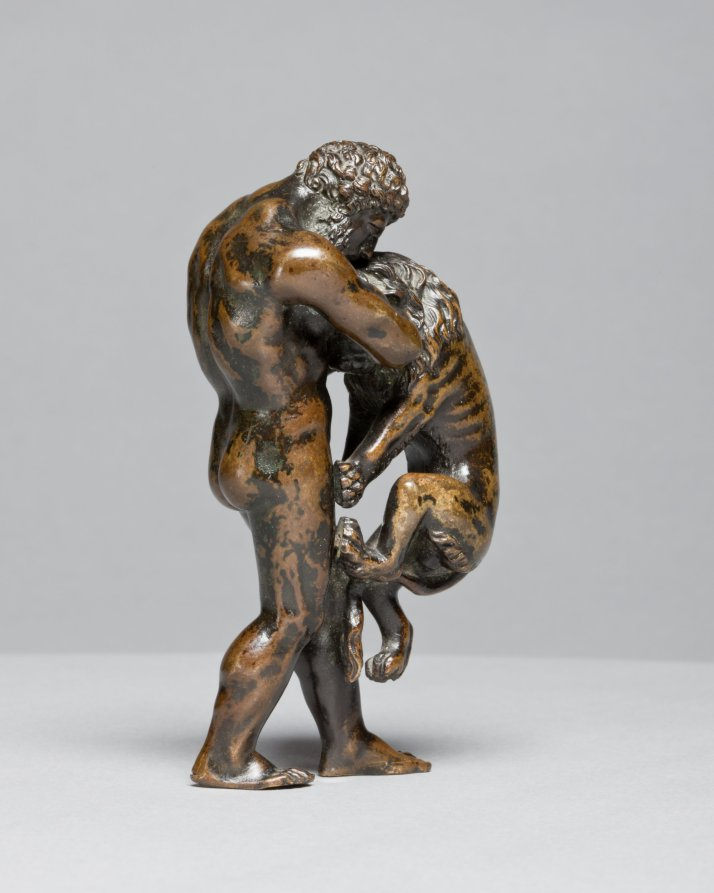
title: Hercules and the Nemean Lion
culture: Italy or France, 16th century or later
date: 1500s or later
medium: bronze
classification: Sculpture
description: The original owner of this work would have understood that this scene referred to the entire story of Hercules, the demi-god who had to accomplish twelve labors. The lion is named after the city of Nemea, near Corinth, a monstrous beast sent by the goddess Hera to wreak havoc on the area. After killing the lion, Hercules wore his pelt, commonly seen in other representations of the hero.